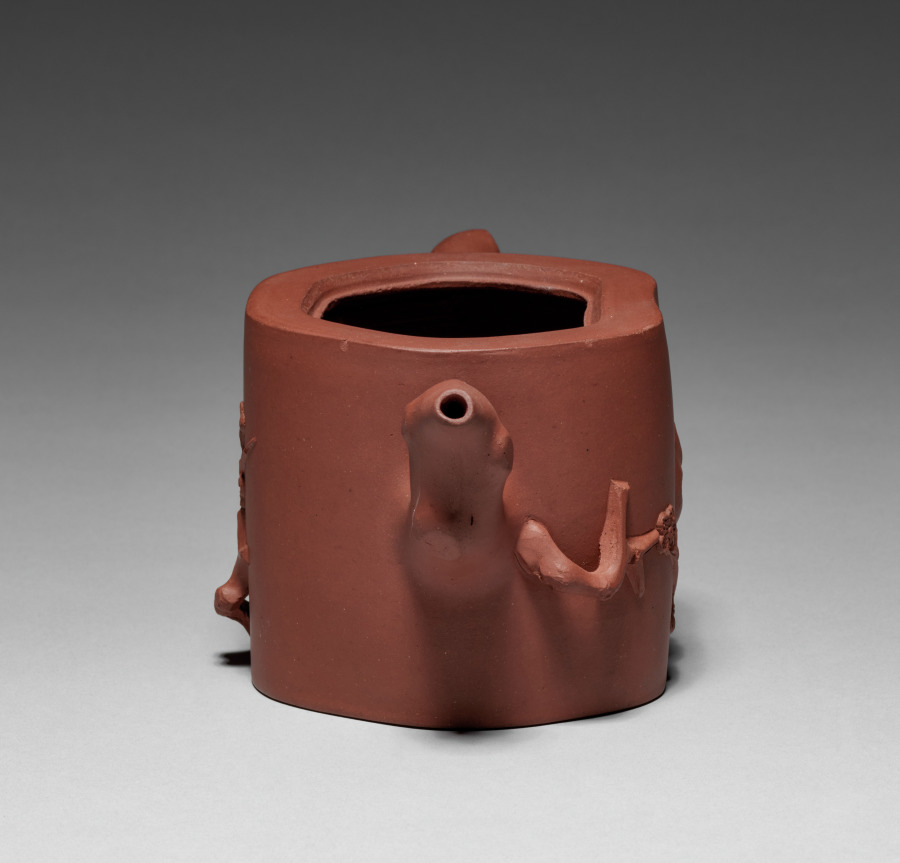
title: Yixing Teapot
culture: China, Qing dynasty (1644-1911)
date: 1800s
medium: stoneware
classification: Ceramic